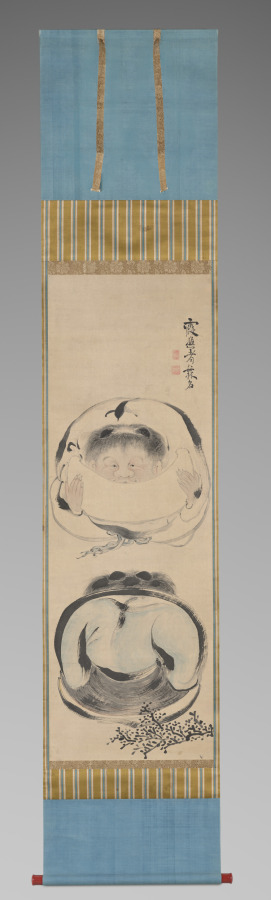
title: Hanshan and Shide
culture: Japan, Edo period (1615–1868)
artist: Ike Taiga (Japanese, 1723–1776)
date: c. 1745–76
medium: hanging scroll; ink and light color on paper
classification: Painting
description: Hanshan and Shide are a pair of individuals associated with Chan, or Zen, Buddhism who lived on Mount Tiantai in China around the 700s to early 800s. In Japan, their names are read Kanzan and Jittoku. Hanshan, whose name means “Cold Mountain,” was a monk-poet, shown reading out from a scroll of his poetry in this work. His close friend Shide, or “Foundling,” was a temple’s custodian. Here, Shide listens intently to Hanshan’s verses, his brush broom behind him.